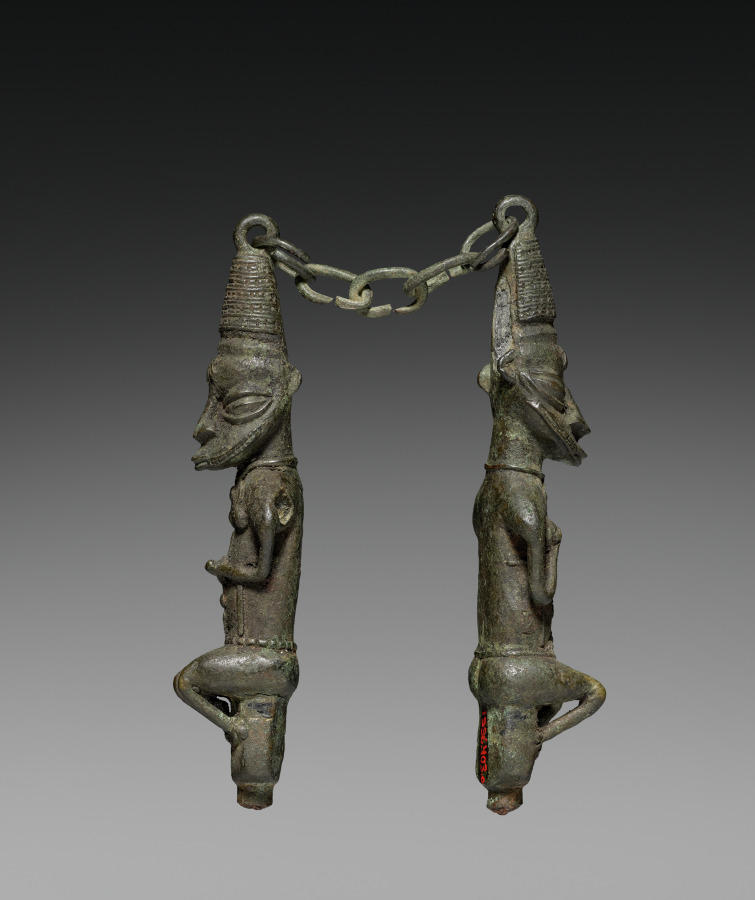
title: Pair of Ritual Staffs (ẹdan Ògbóni)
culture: Africa, West Africa, Nigeria, Yorùbá-style maker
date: possibly 1800s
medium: Copper alloy and iron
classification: Sculpture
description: The chain connecting these two figures allows them to be worn in public by a member of the Ògbóni or Òṣùgbó association as authority emblems. The male on the right gives the association’s typical salute by clasping his left fist on the right one, while the female on the left holds her breasts as a sign of welcome and generosity. The use of copper alloy and iron expresses Ògbóni/Òṣùgbó's concerns with longevity and durability.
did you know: Imagine how this would look when its owner wore it; the chain would go around the back of the neck and the figures would rest on their chest.